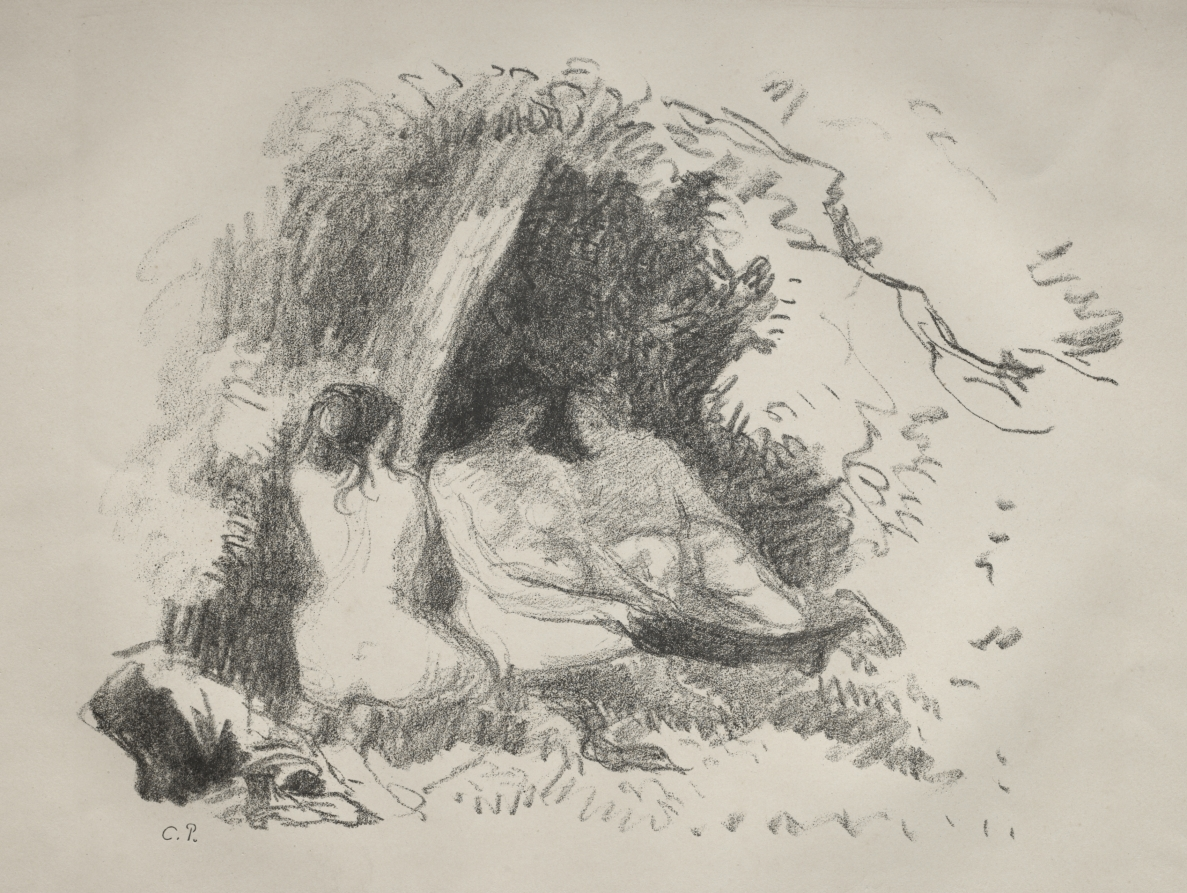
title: Nude Women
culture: France, 19th century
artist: Camille Pissarro (French, 1830–1903)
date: c. 1896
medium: lithograph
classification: Print